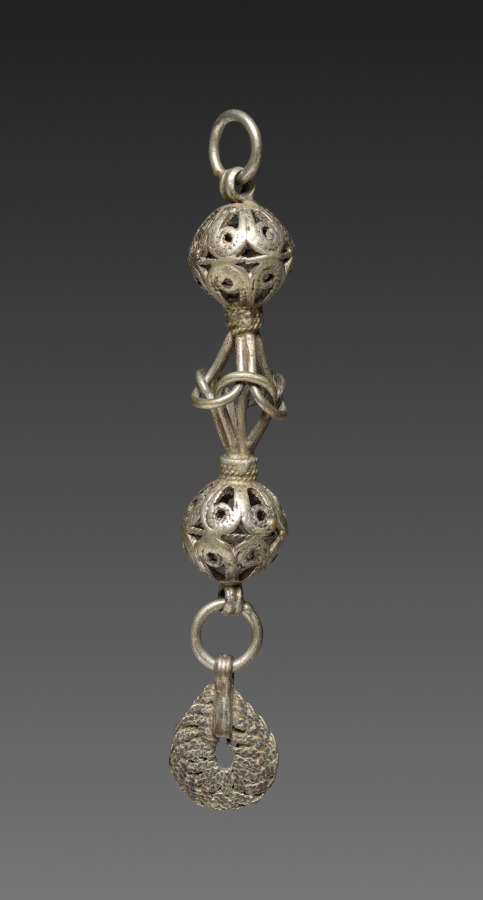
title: Button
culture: Balkans, 19th century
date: 1800s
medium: silver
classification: Jewelry